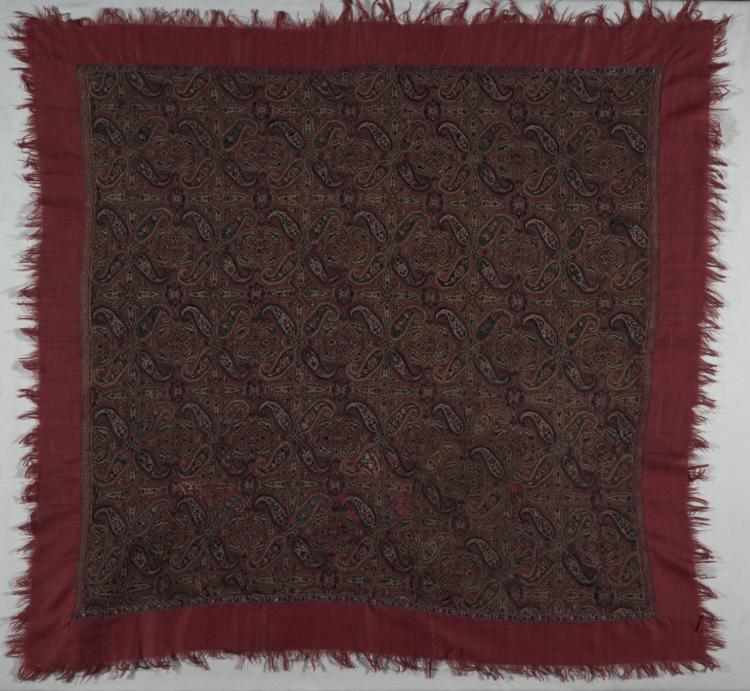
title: Fragment of a Shawl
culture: India, Kashmir, late 18th - early 19th century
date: late 1700s - early 1800s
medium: tapestry twill; wool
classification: Textile